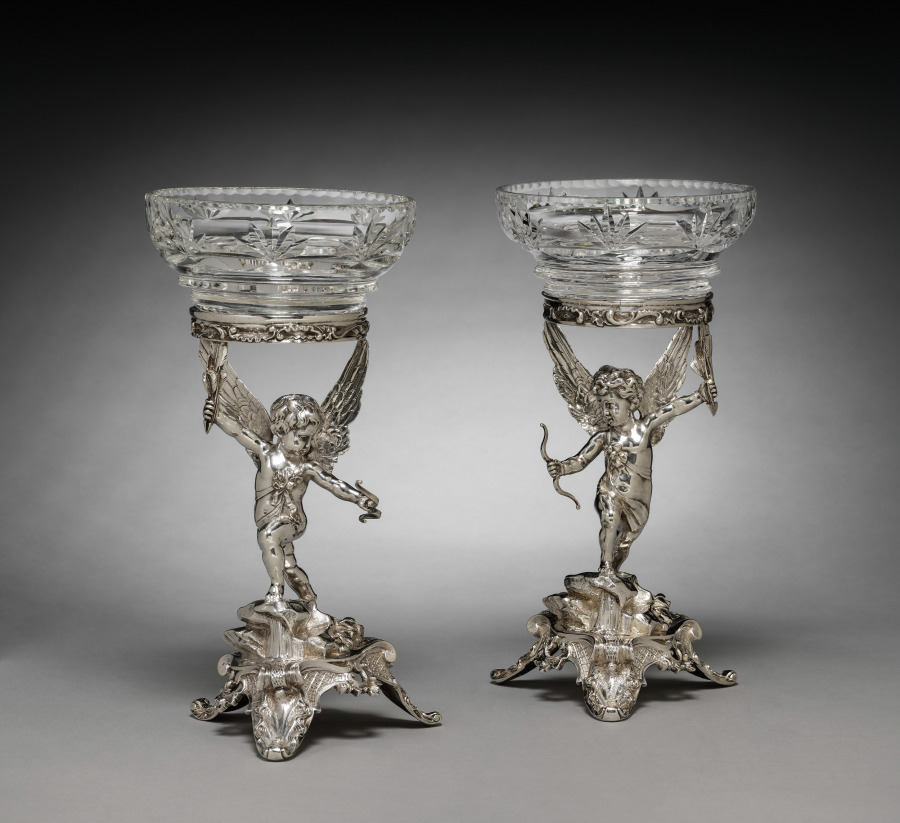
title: Pair of Compotes and Stands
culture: Russian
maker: House of Fabergé (Russian, 1842–1918)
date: c. 1890–99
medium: silver, glass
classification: Silver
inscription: Inscribed “K. Fabergé” in Cyrillic, surmounted by the double-headed Imperial eagle.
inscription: “88” silver standard